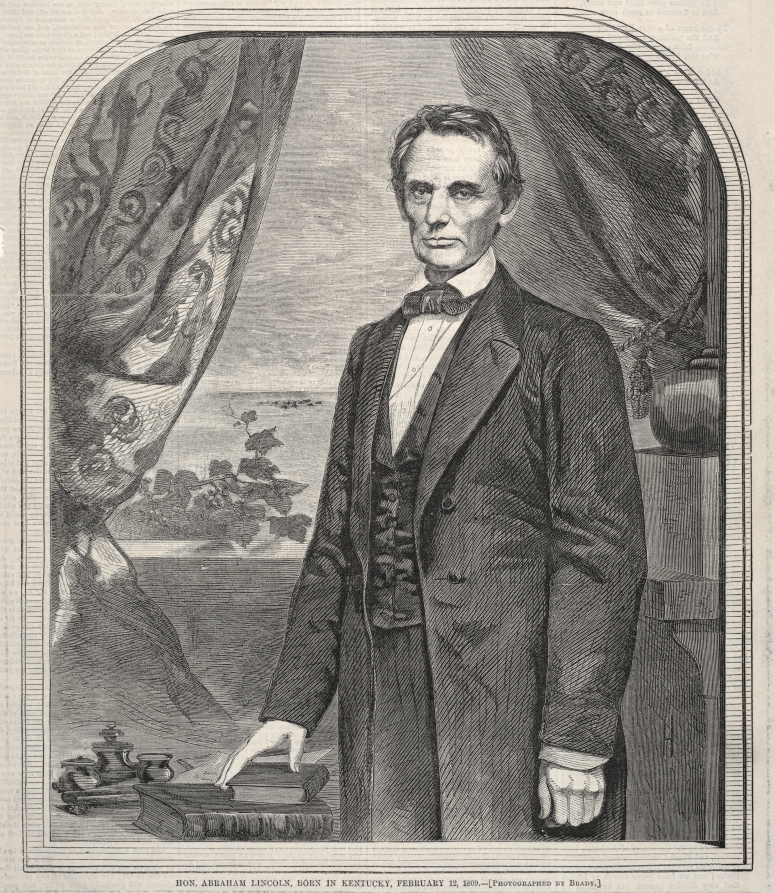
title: Hon. Abraham Lincoln, Born in Kentucky, February 12, 1809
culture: America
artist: Winslow Homer (American, 1836–1910)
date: 1860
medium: wood engraving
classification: Print